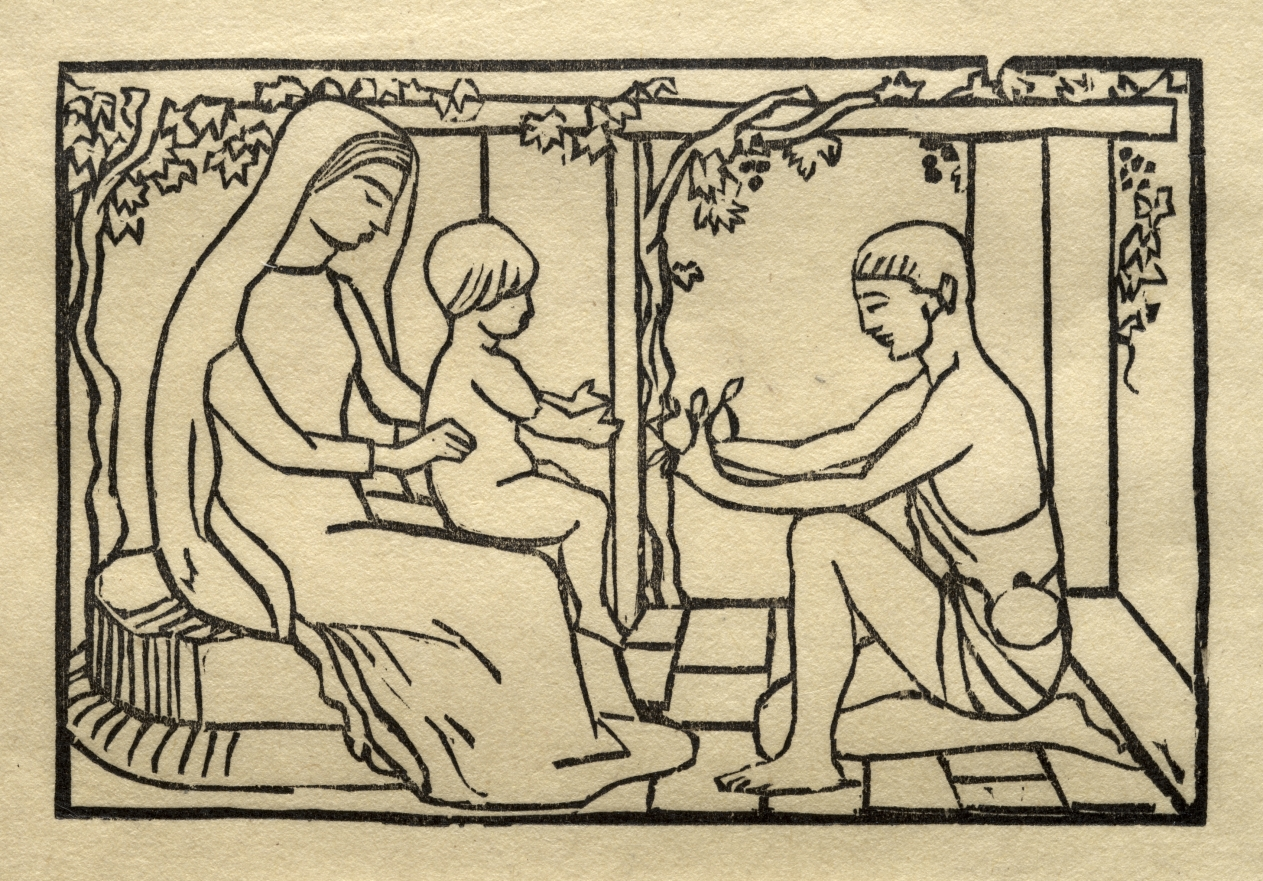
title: Lucina Smiles on Her Boy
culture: France, 20th century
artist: Aristide Maillol (French, 1861–1944)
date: 1912–14 or 1925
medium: woodcut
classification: Print